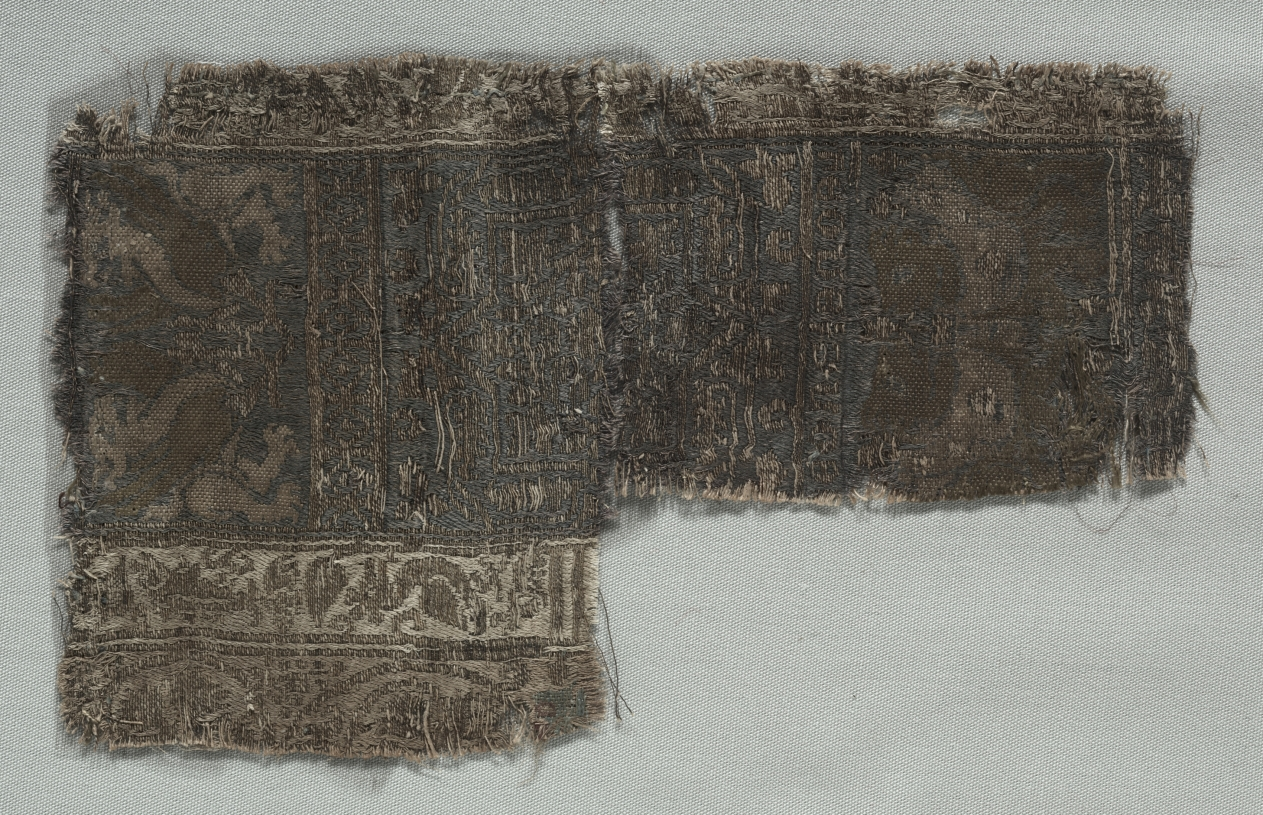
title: Silk Fragment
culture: Italy, second half of 14th century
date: 1350–1399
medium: lampas weave, brocaded; silk and gold thread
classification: Textile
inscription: the smaller fragment bears the inscription reading: "LEONE" forrwards and in retrograde.